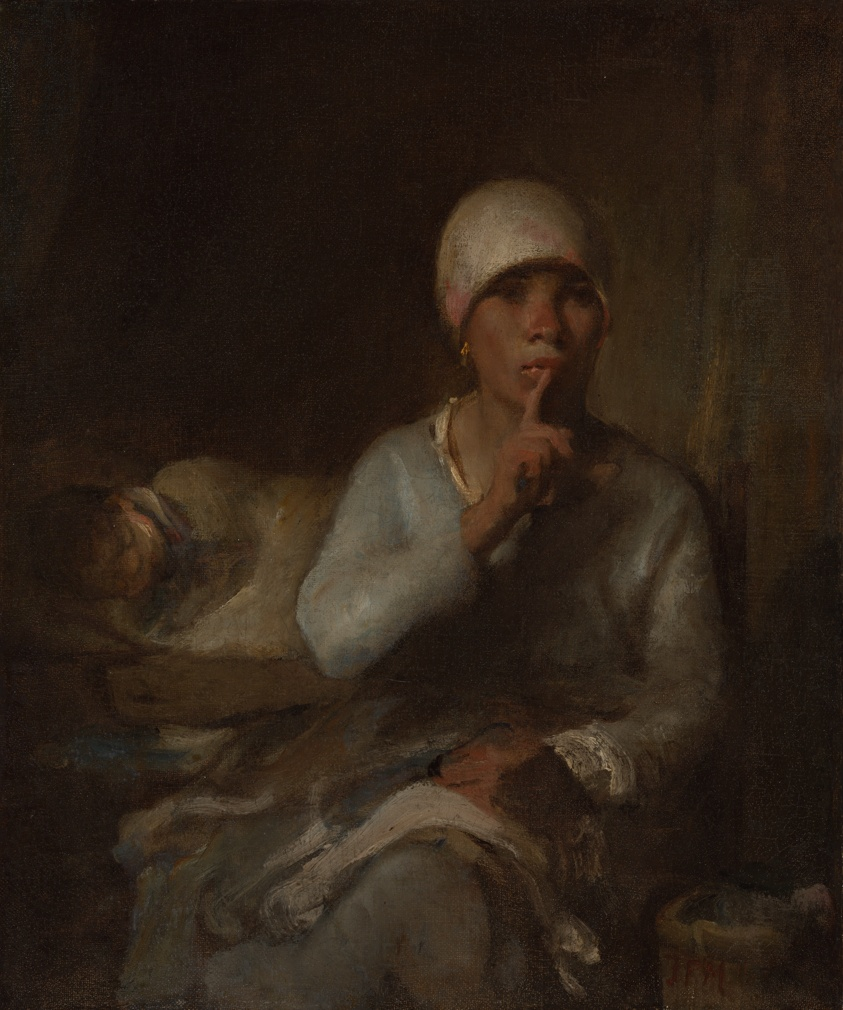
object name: Painting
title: Woman and Child (Silence)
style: 19th century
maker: Attributed to Auguste Boulard, the elder (French, 1825–1867)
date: 1855/60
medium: Oil on canvas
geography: France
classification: oil on canvas; paint; painting; european painting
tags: woman, sleep, night, interior, children, woman with children, women